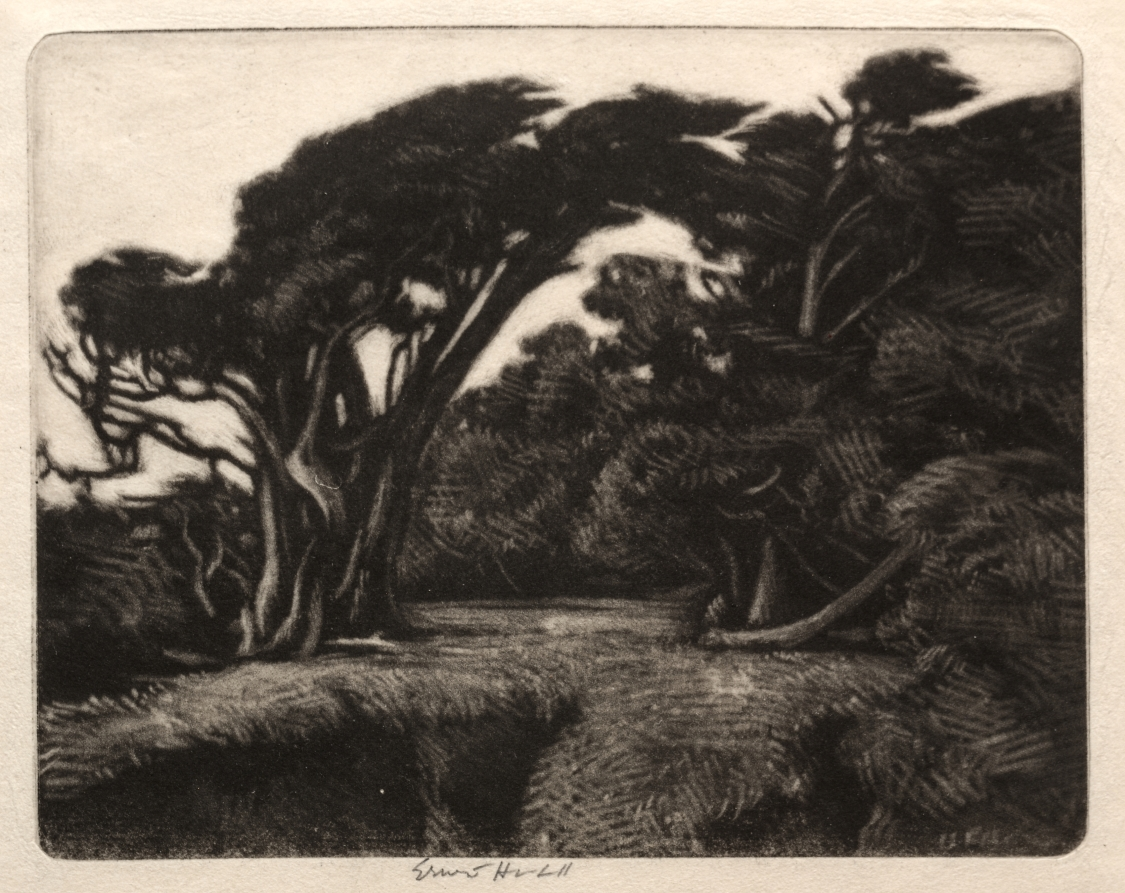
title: Cypress Bower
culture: America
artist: Ernest Haskell (American, 1876–1925)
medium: mezzotint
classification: Print